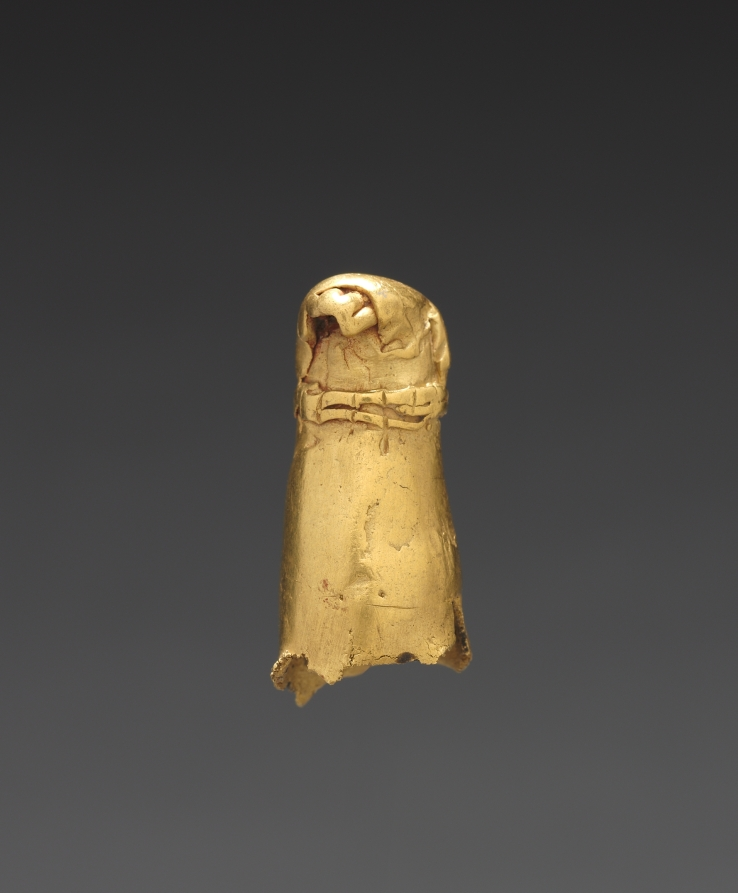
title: Fragment of an Animal Head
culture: Colombia, Quimbaya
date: 1–800 CE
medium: gold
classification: Metalwork